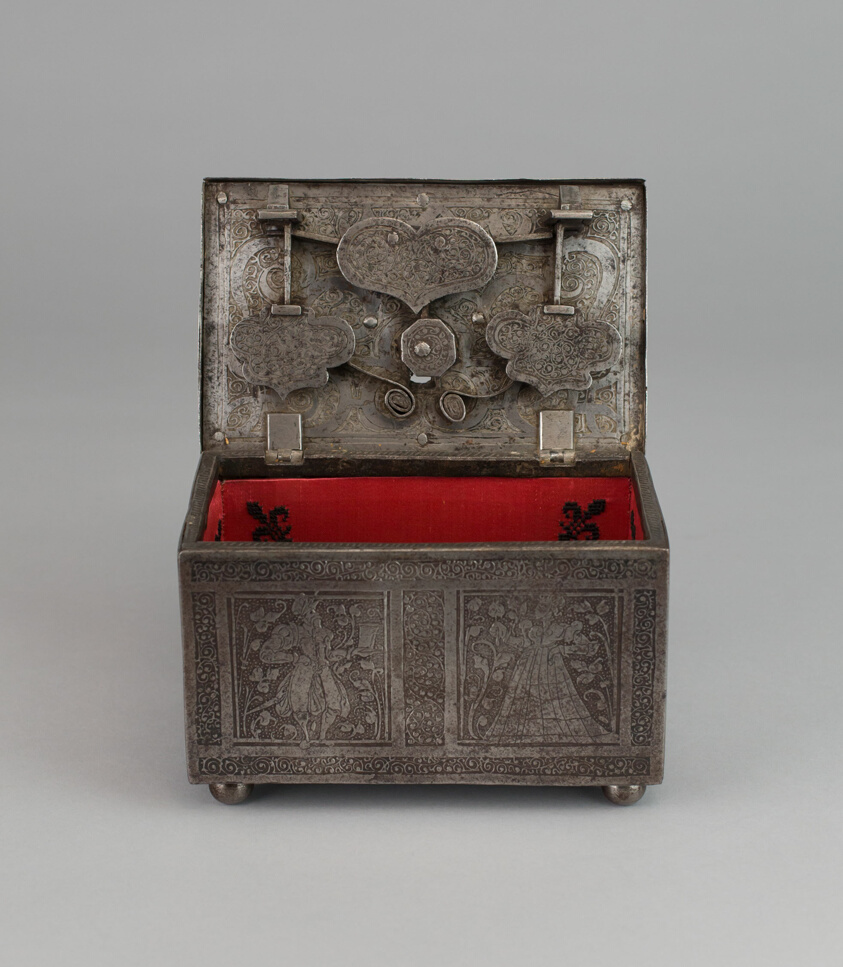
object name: Decorative Arts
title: Casket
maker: South German; Nuremberg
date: c.1590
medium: Steel, iron, brass, and silk textile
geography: Augsburg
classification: metalwork; european decorative arts; decorative arts